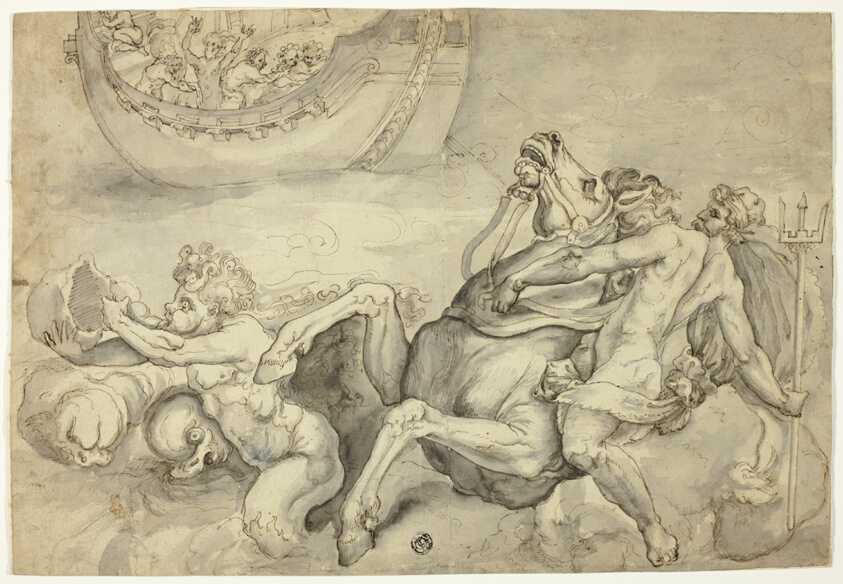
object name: Drawing and Watercolor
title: Neptune Calming the Tempest Raised by Aeolus against Aeneas ("Quos Ego")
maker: Italian; Second half of the 16th Century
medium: Pen and brown ink with brush and gray wash, over black chalk, with touches of white gouache, on tan laid paper, laid down on tan laid paper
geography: Italy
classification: ink with wash; drawings (visual works); prints and drawing